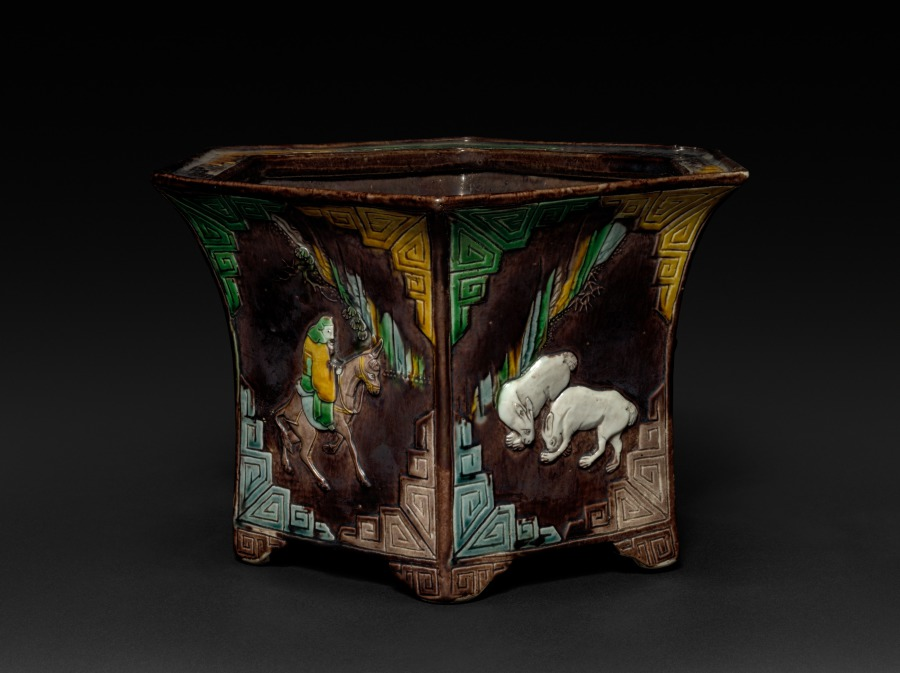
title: Cachepot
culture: China, Qing dynasty (1644-1911), Kangxi reign (1661-1722)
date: 1662–1722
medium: porcelain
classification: Ceramic